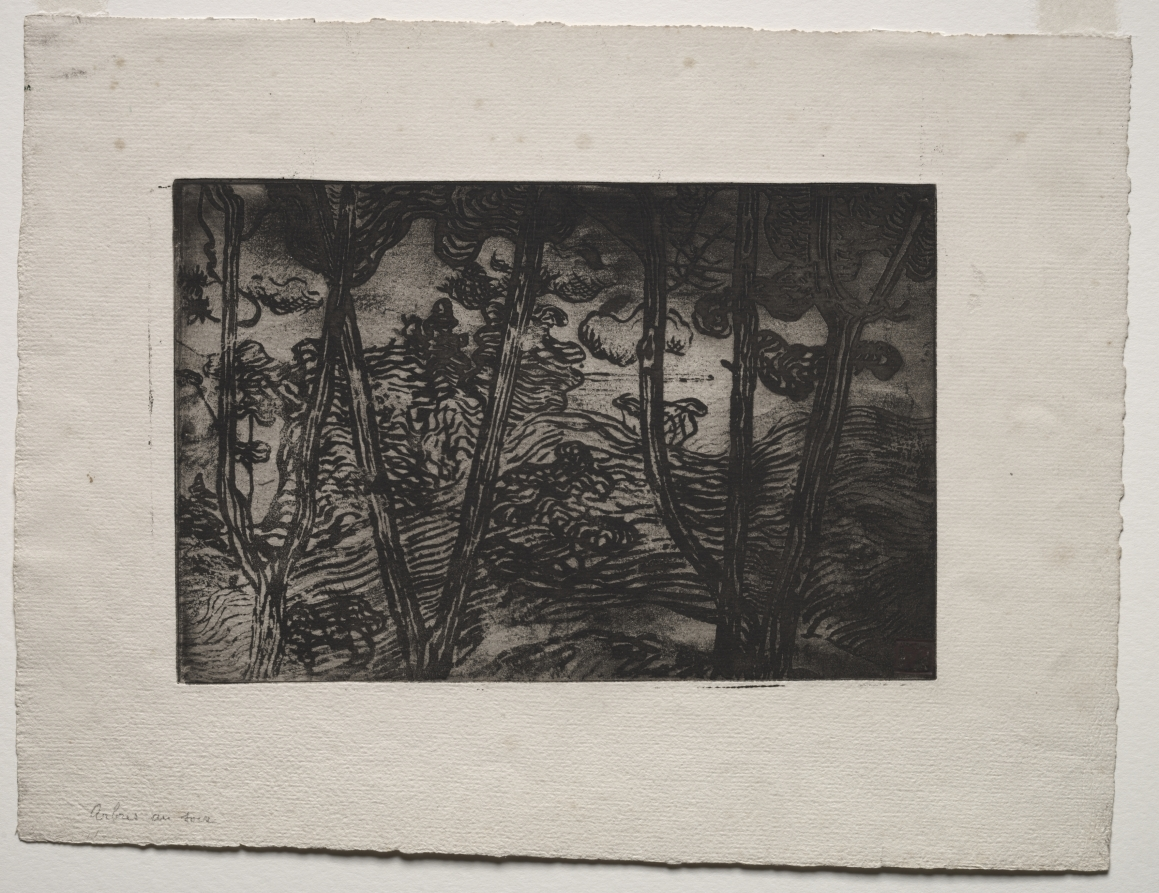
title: Trees at Night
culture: France, 19th century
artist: Armand Séguin (French, 1869–1903)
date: c. 1894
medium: etching (sugar-lift aquatint?)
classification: Print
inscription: lower left, in graphite: Arbres au soir